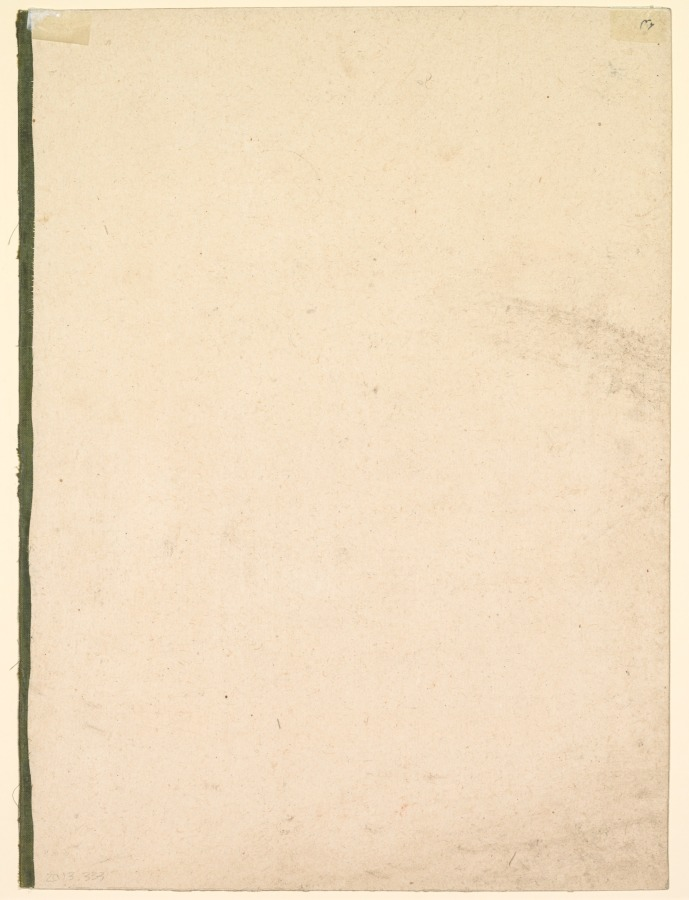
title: A House Burgled at Night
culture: Mughal India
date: c. 1700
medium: Gum tempera and gold on paper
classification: Painting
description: In this night scene a band of robbers have climbed over the walls of a Mughal house and, from a courtyard, are successfully carrying out the possessions of its owners while a lady flees through the door. The speed of her movement is expressed in the swinging motion of her diaphanous skirt and the scarf clutched in her hand, as well as by the shoes abandoned on the ground in her haste. This depiction of unruly behavior and its effects are perhaps an expression of the violent succession of emperors that threw the Mughal court into distress at the beginning of the 18th century.